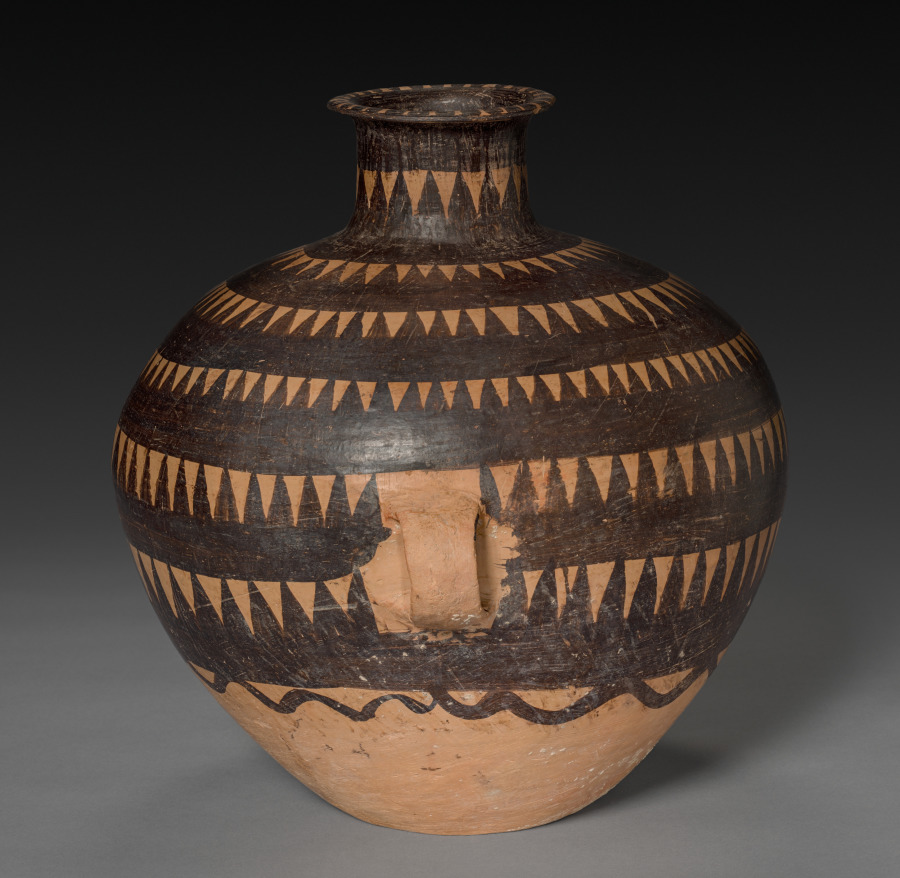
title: Urn with Triangular Patterns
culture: Northwest China, Neolithic period, Majiayao culture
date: c. 3300–c. 2000 BCE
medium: Earthenware with slip-painted decoration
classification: Ceramic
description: Majiayao is the name of one of the earliest cultures of China. They were renowned for production of vessels with black-slip painted patterns.